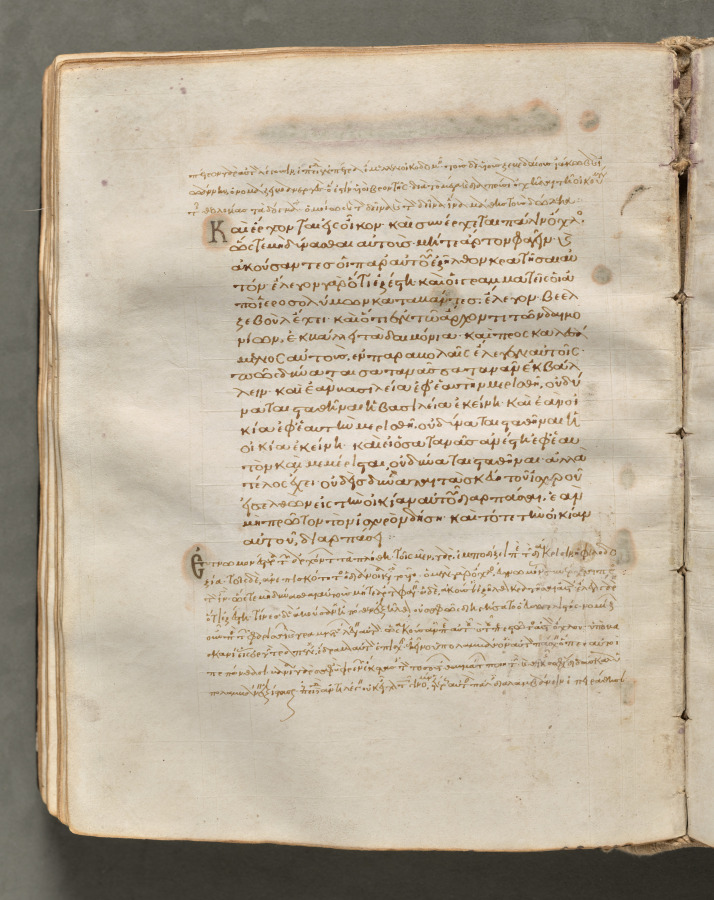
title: Text, folio 141 (verso), from a Gospel Book with Commentaries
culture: Byzantium, Constantinople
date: c. 1000–1100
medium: ink, tempera, and gold on vellum; leather binding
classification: Bound Volume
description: Each of the four gospels in this book opens on a page with brilliantly illuminated borders depicting the author of the text as well as birds-principally peacocks, symbols of the immortality of the soul-and fountains, representing the fountain of life and the salvation of the soul. This volume consists of 428 leaves with texts in Greek. Its level of sophistication suggests that it was probably written and decorated in a monastery in Constantinople.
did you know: Gospel Books were carried in procession through Byzantine churches.